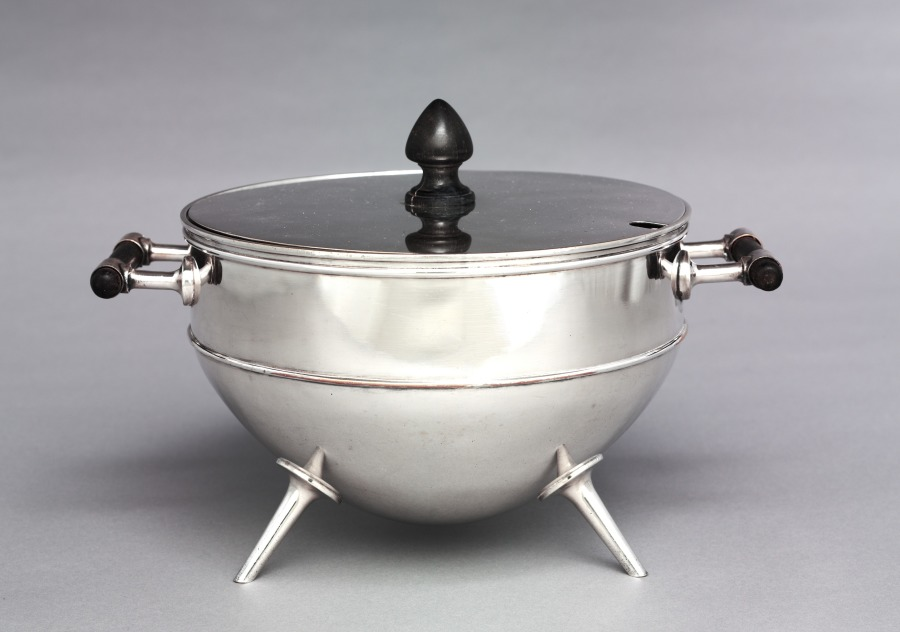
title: Covered Tureen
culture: England, 19th century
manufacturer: Hukin & Heath (British)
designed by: Christopher Dresser (British, 1834–1904)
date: c. 1880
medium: silver plated metal, ebony handles and knop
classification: Metalwork